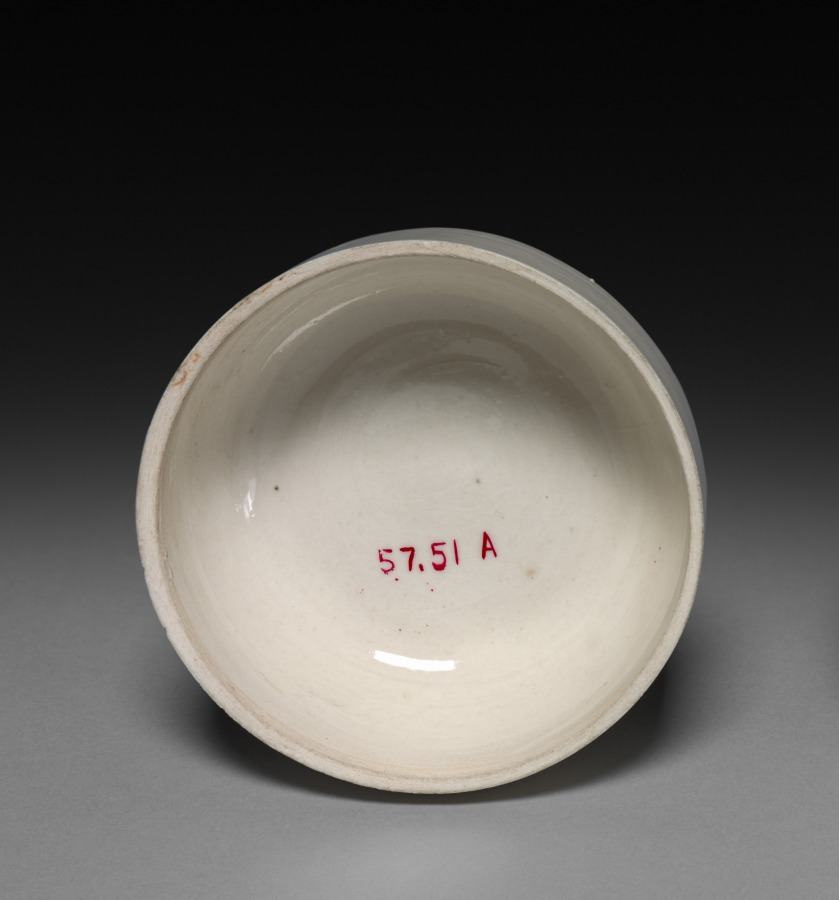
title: Covered Box (lid)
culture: China, Hebei province, Quyang, Northern Song dynasty (960–1127)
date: 1000s–1100s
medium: white porcelain, Ding ware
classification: Ceramic